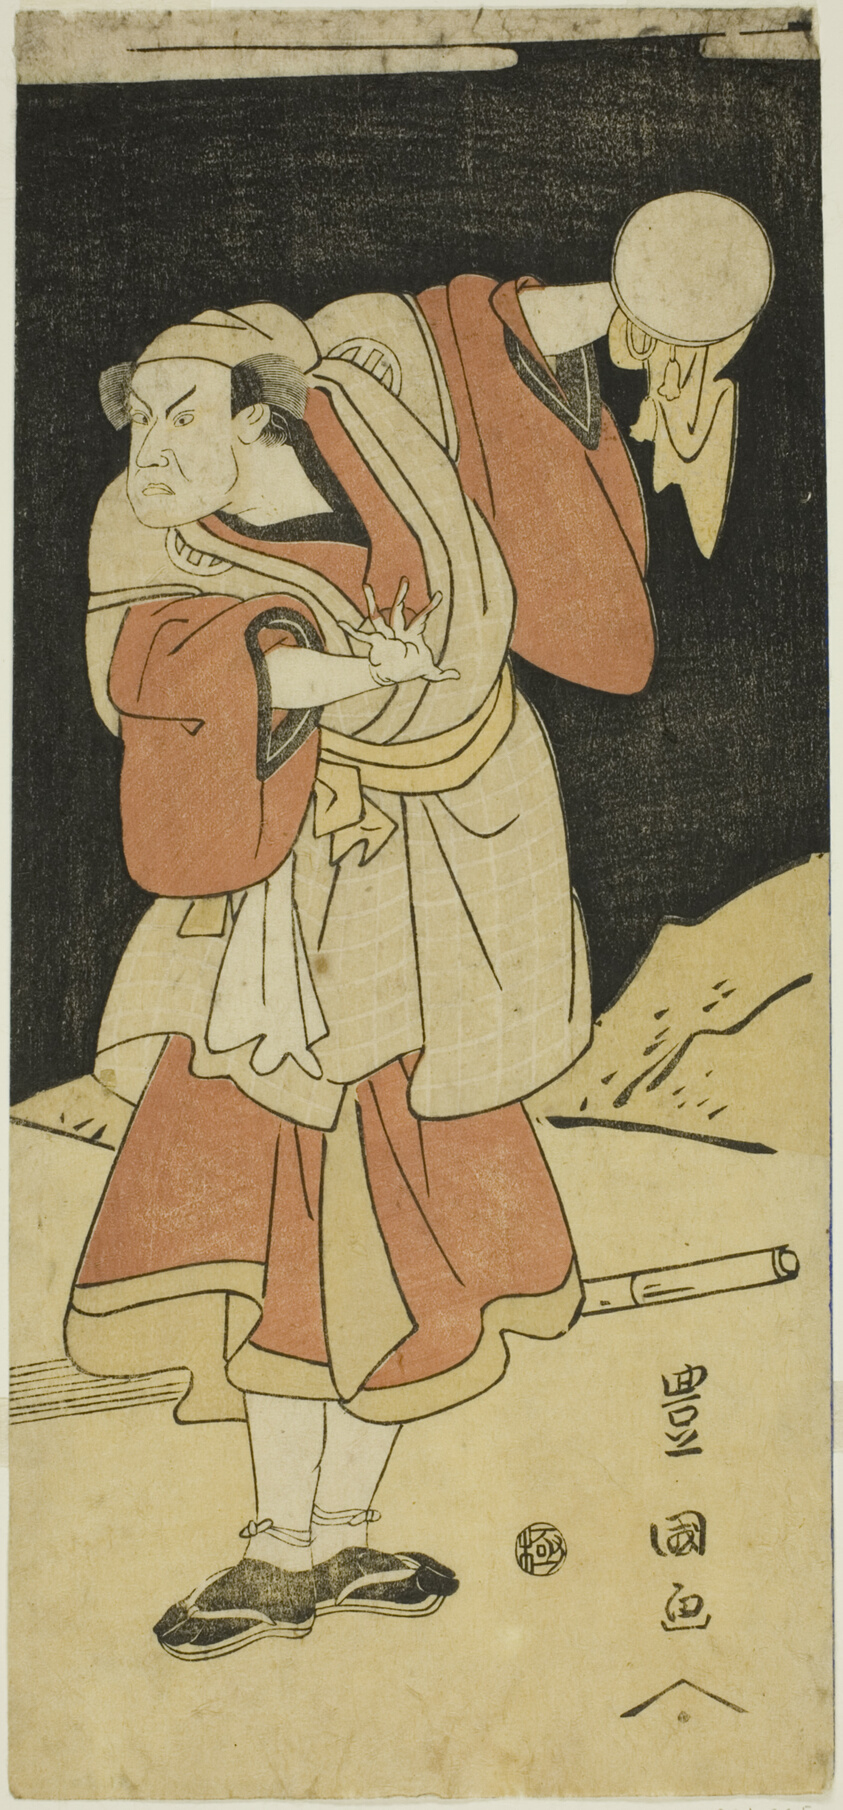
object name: Print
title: Actor in a scene from a drama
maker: Utagawa Toyokuni I 初代 歌川 豊国; Japanese, 1769–1825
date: Late 18th century and early 19th century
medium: Color woodblock print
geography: Japan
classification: print; asian art